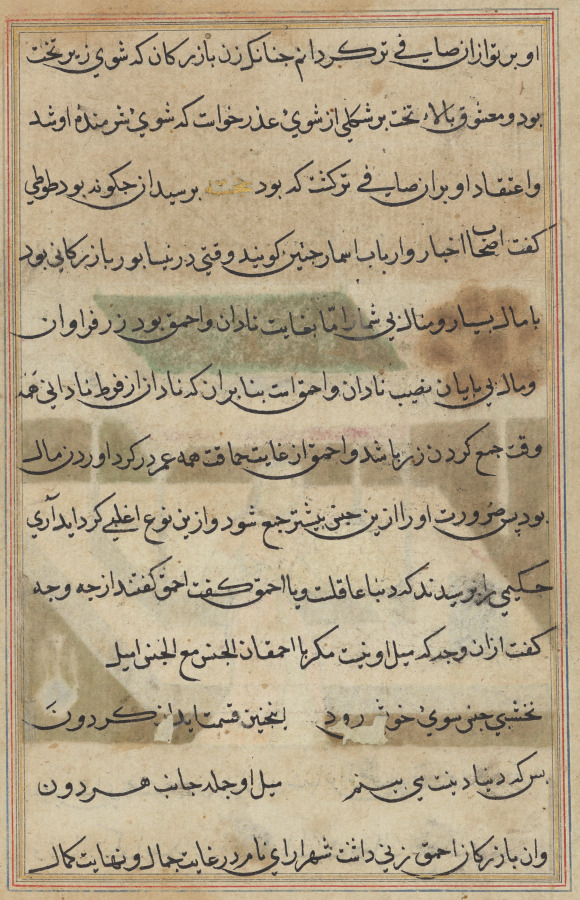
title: Page from Tales of a Parrot (Tuti-nama): text page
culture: Mughal India, court of Akbar (reigned 1556–1605)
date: c. 1560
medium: gum tempera, ink, and gold on paper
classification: Painting